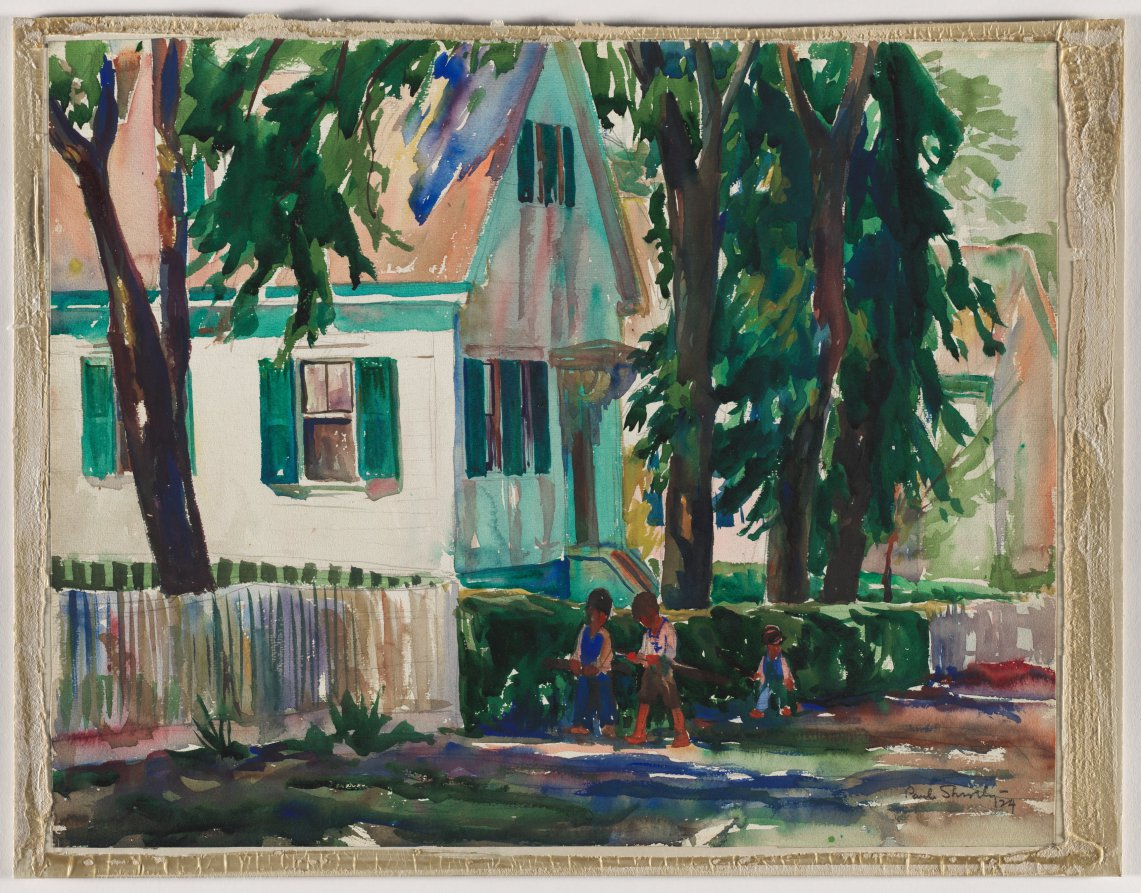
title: High Noon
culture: America, Ohio, Cleveland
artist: Paul Shively (American, 1897–1987)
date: 1924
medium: watercolor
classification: Drawing